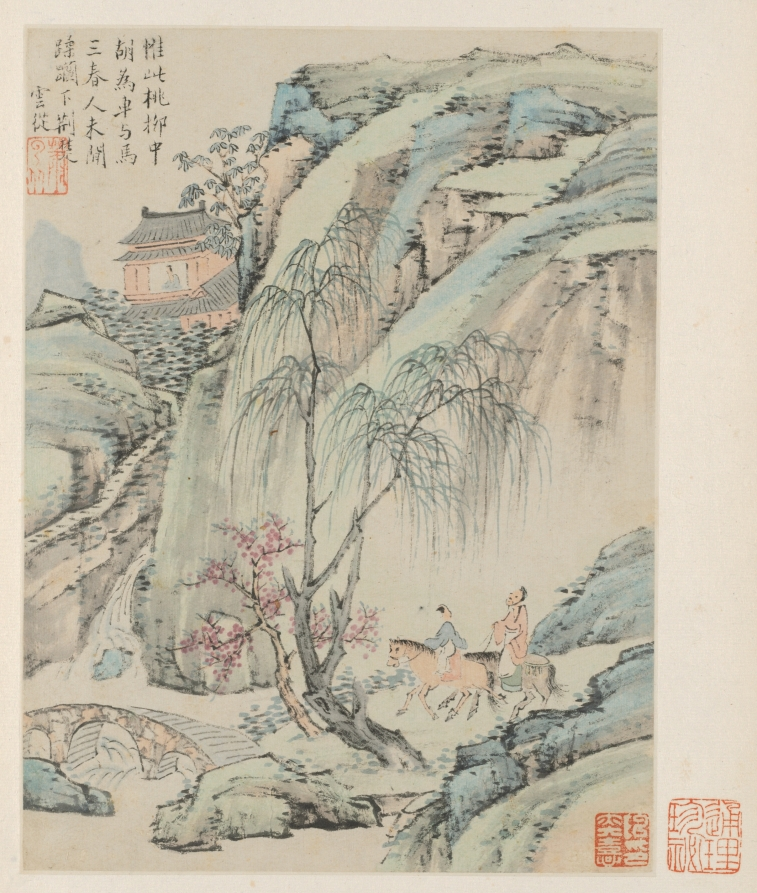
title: Album of Seasonal Landscapes, Leaf B (previous leaf 1)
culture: China, Qing dynasty (1644–1911)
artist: Xiao Yuncong (Chinese, 1596–1673)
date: 1668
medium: album leaf; ink and light color on paper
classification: Painting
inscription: Artist's inscription, signature, and 8 seals. Leaf A. Alas why among these peach and willow trees,/ Are there so many carriages and horses?/ In spring, the people do not sit idle -/ They tramp down all the bushes. Yuncong [seal] Xiao Yuncong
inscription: 9 additional seals: 2 of Chen Yixi 陳奕禧 (1646-1709); 4 of Li Yufen 李玉棻 [Li Yunhu 李韵湖] (active mid-1800s); 3 unidentified.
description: Throughout his lifetime, Xiao Yuncong visited Nanjing and Yangzhou, cities embedded in the fertile and water-rich Jiangnan region, as reflected in his paintings. Xiao painted from nature, and his landscapes are informed by the seasons and his travels, as well as by his experience as a print designer. Xiao’s fresh, light colors continue to appear in later Shanghai school paintings. This album was formerly in the collection of Li Yufen in Yangzhou and then owned by Wu Hufan in Shanghai. While the artist impressed his seal consistently below his poetic inscriptions in the upper parts of the composition, the red seals on the margins and in the lower corners of the paintings are impressions by the album’s previous owners.